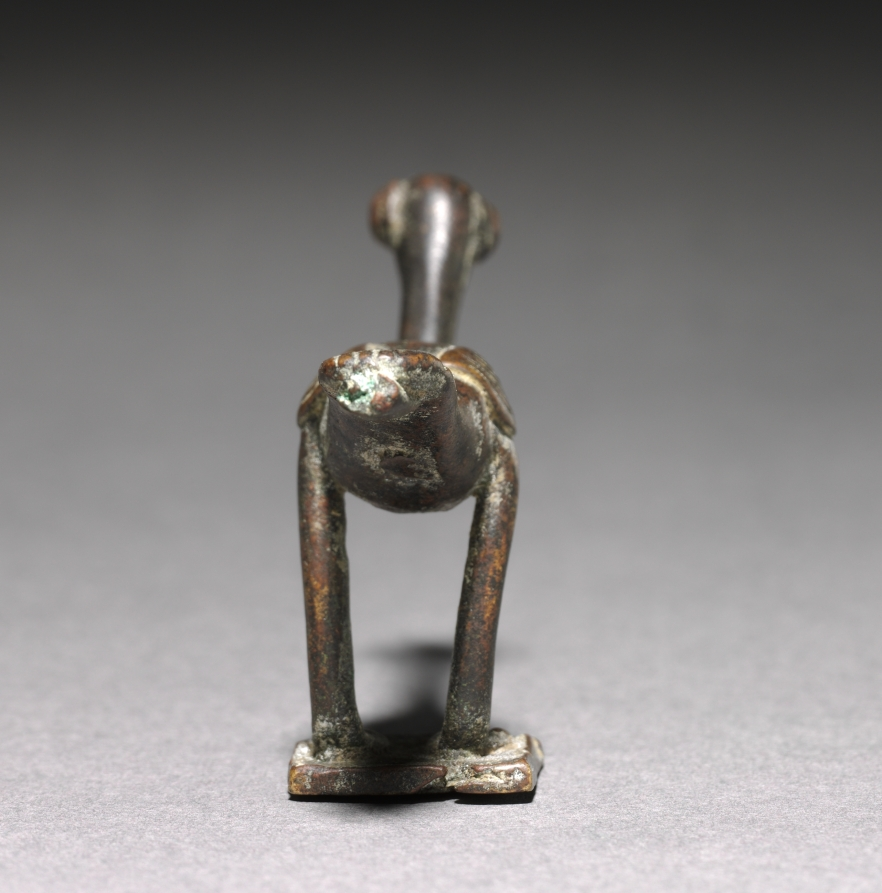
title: Hornbill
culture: Africa, West Africa, Côte d'Ivoire, Senufo style, unknown maker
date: 1900s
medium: Copper alloy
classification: Sculpture